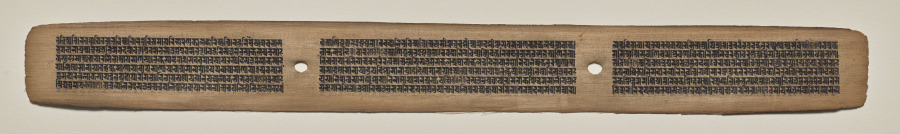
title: Text, Folio 71 (recto), from a Manuscript of the Perfection of Wisdom in Eight Thousand Lines (Ashtasahasrika Prajnaparamita-sutra)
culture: Eastern India, Bihar, Vikramashila Monastery. Painting: Nepal, Kathmandu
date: Sunday, September 14, 1119 (year 239 of the Newar Samvat in the month of Ashvina)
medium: gum tempera and ink on palm leaves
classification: Painting